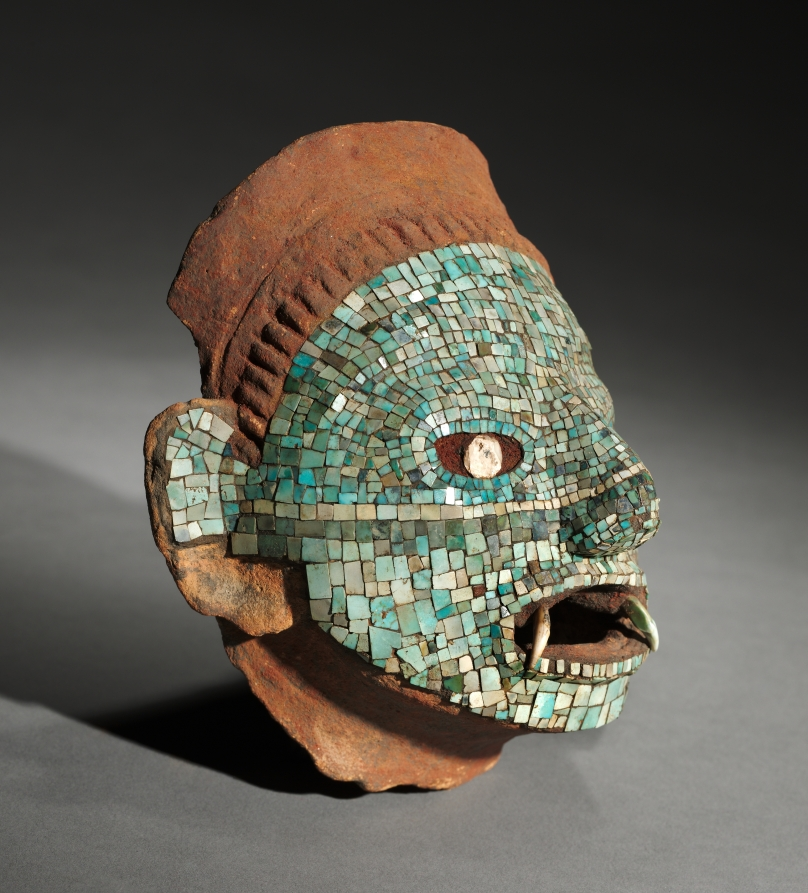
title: Mask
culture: Mesoamerica (or Mexico), 16th century or earlier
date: before 1519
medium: turquoise and terracotta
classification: Sculpture